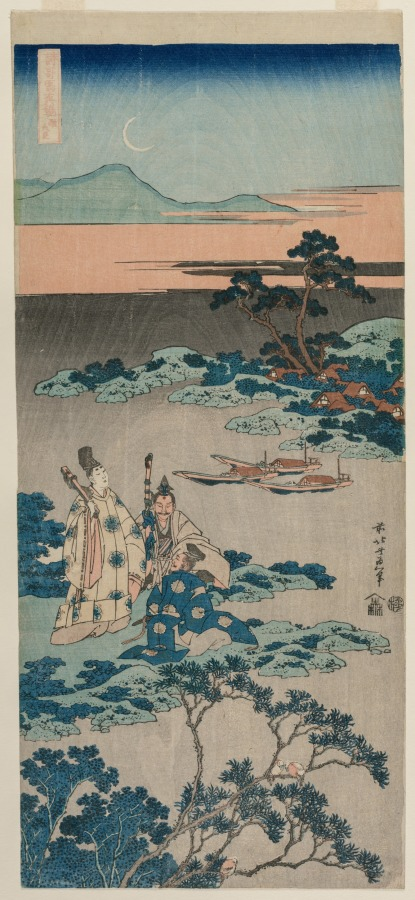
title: The Minister Toru Daijin Standing by a Lake Beneath a Crescent Moon, from the series A True Mirror of Chinese and Japanese Poetry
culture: Japan, Edo period (1615–1868)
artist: Katsushika Hokusai (Japanese, 1760–1849)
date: 1834–35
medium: color woodblock print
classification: Print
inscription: Signature: Zen Hokusai Iitsu hitsu. Publisher: Moriya Jisuke (emblem). Censorship Seal: kiwame.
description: A high-ranking minister, Toru (822–895) was the son of an emperor. In this scene, he enjoys the company of two other men in his landscape garden overlooking the water. Here Hokusai may have illustrated a poem by Toru that mentions boats floating on the water in bright moonlight, shaded by the pines.